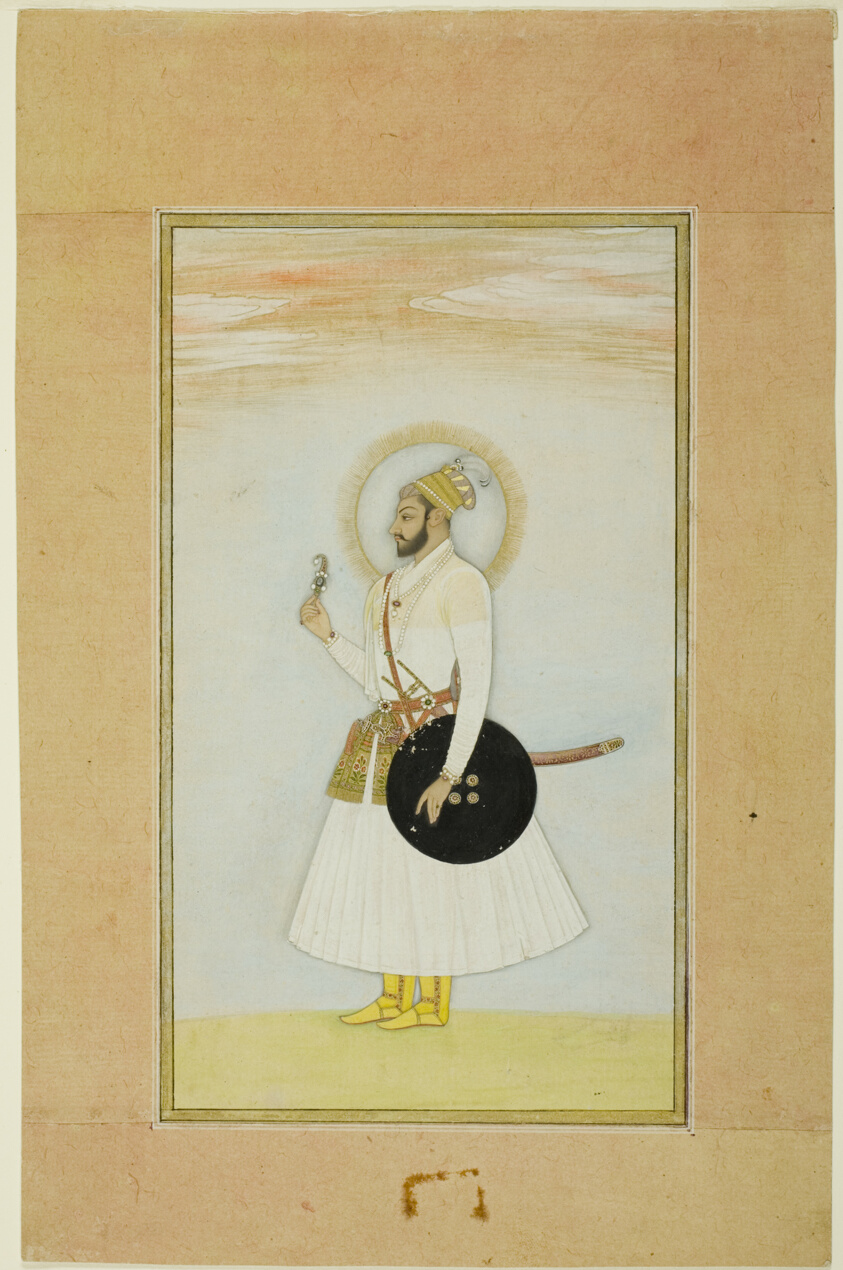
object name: Painting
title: Portrait of Muhammed Azim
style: South Asian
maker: India; Rajasthan, Kishangarh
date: 18th century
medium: Opaque watercolor and gold on paper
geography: India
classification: miniature; asian art; painting